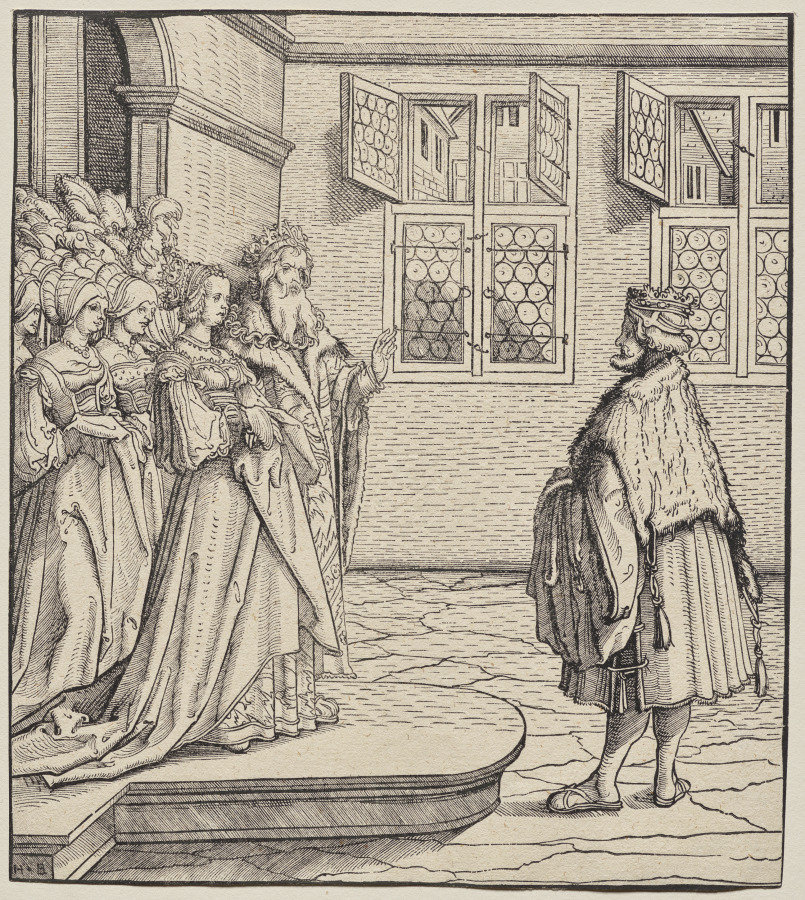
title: The Banished Duke of Otnop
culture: Germany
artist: Hans Burgkmair (German, 1473–1531)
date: 1512–1516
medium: woodcut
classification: Print